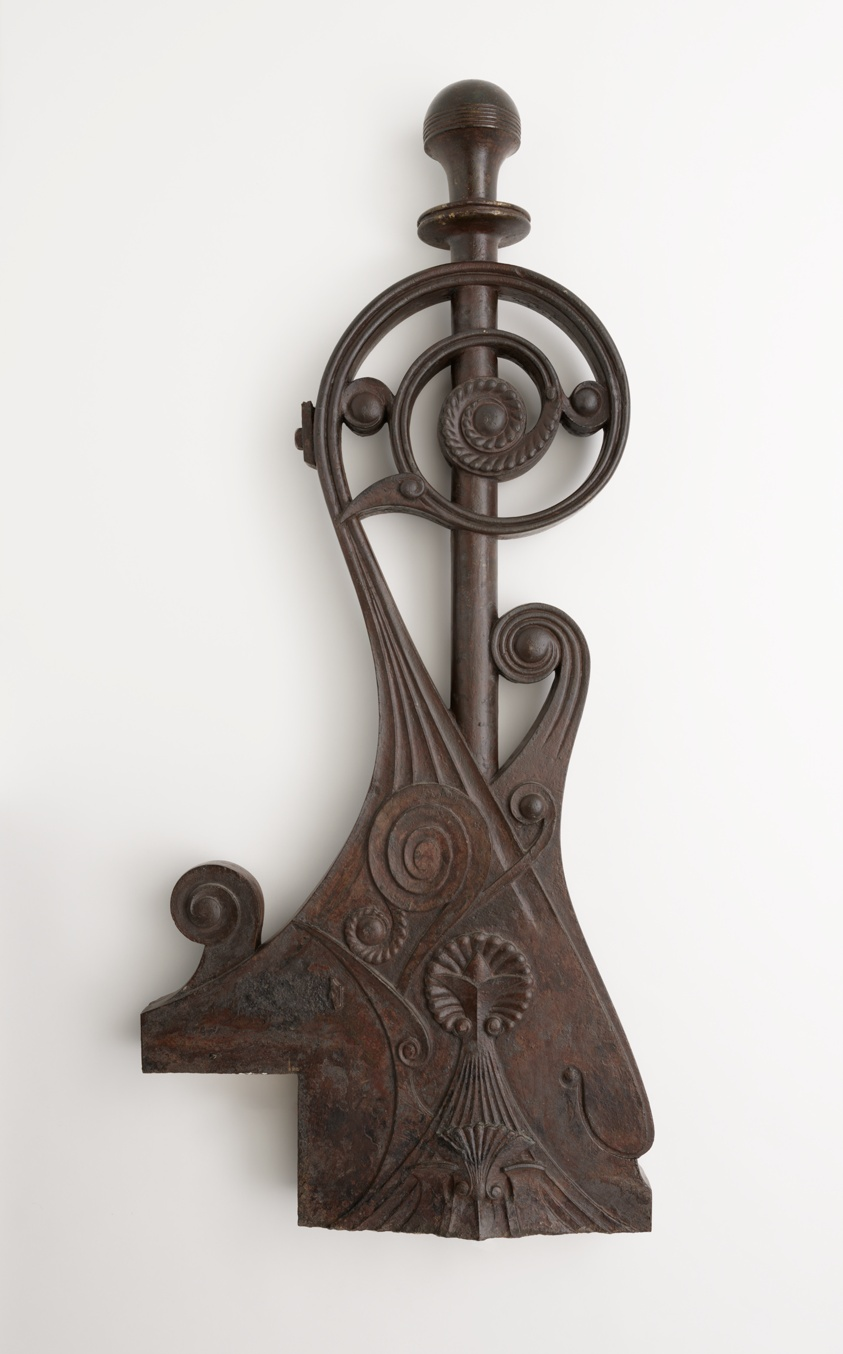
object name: Architectural fragment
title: Newel Post from the Morris Selz House, Chicago, Illinois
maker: Adler and Sullivan (American, 1883-1896); Louis Sullivan (American, 1856–1924); Dankmar Adler (American, born Germany, 1844–1900)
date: 1883 (demolished 1967)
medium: Cast iron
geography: United States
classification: architectural fragment; architecture